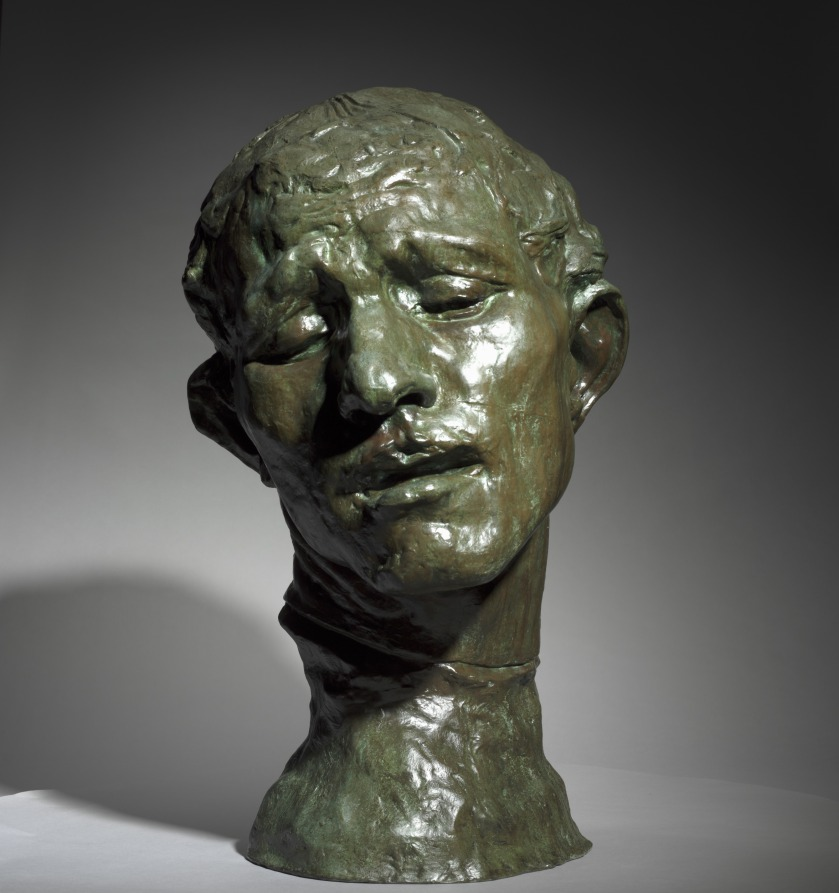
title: Heroic Head of Pierre de Wissant, One of the Burghers of Calais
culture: France, 19th century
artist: Auguste Rodin (French, 1840–1917)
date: 1886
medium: bronze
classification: Sculpture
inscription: inscribed at neck, left: A.Rodin; inscribed lower back: Alexis Rudier/Fondeur-Paris.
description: This sculpture depicts one of the figures in Rodin’s large public monument The Burghers of Calais (1884–89), featuring six French men who volunteered to be taken prisoner by the English in exchange for lifting the siege of Calais during the Hundred Years War (1337–1453). Pierre de Wissant’s anguished expression suggests extreme mental suffering as he contemplates his expected execution. Rodin exhibited a life-size version of the figure as an independent work before completing the monument. He later made multiple versions in various sizes and media.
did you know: This sculpture depicts the head of a figure from Rodin's large public monument The Burghers of Calais (1884-89). The CMA also owns a plaster version of the head.